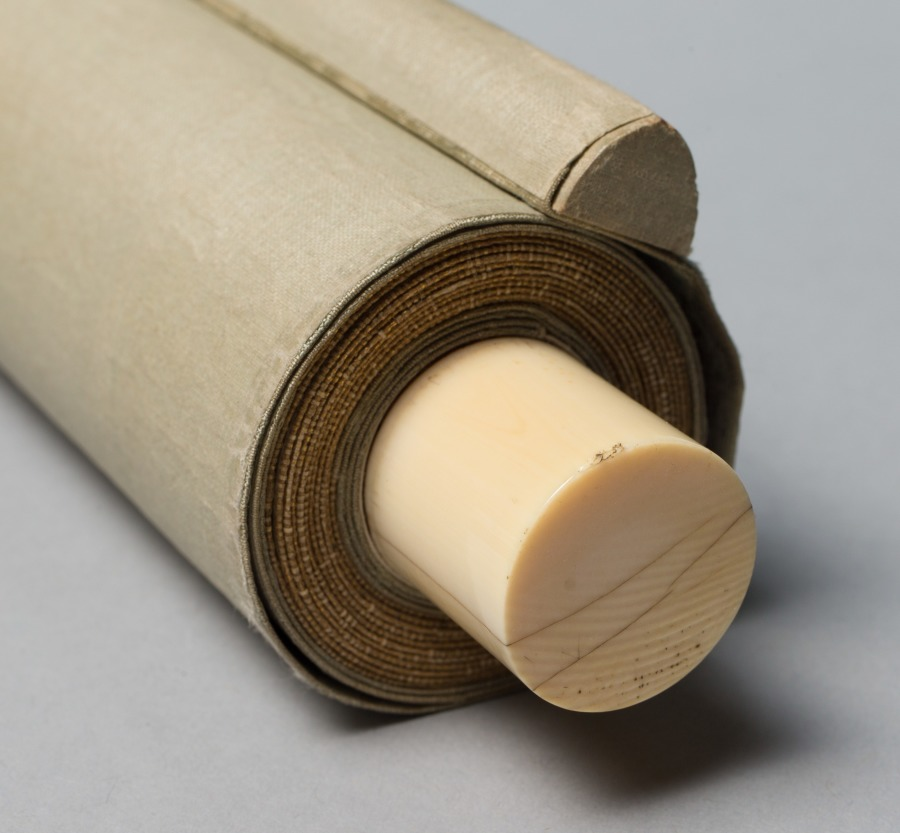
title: White-Robed Guanyin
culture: China, Southern Song dynasty (1127-1279)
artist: attributed to Zhang Yuehu (Chinese, active 1200s)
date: late 1200s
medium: Hanging scroll; ink on paper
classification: Painting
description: The figure here sits on a rocky elevation representing Potalaka in the Southern Sea, Avalokitesvara’s island home. A vase with a bamboo sprig holds pure water, the nectar of life. Bamboo shines through the figure’s halo, a way of seeing the illusionary world through the Buddhist truth. Avalokitesvara (Guanyin in Chinese), the bodhisattva of compassion, was integrated into the Chan Buddhist canon of venerated beings. In this context, the bodhisattva is often depicted in its female manifestation as the White-Robed Guanyin. The worship of the feminine White-Robed Guanyin has its origins on Mount Tianzhu in Hangzhou, where Qian Liu (852–932), ruler of the Wuyue kingdom, established the Upper Tianzhu Monastery to venerate her image.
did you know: As an artist, Zhang Yuehu was better known in Japan than in his own country.